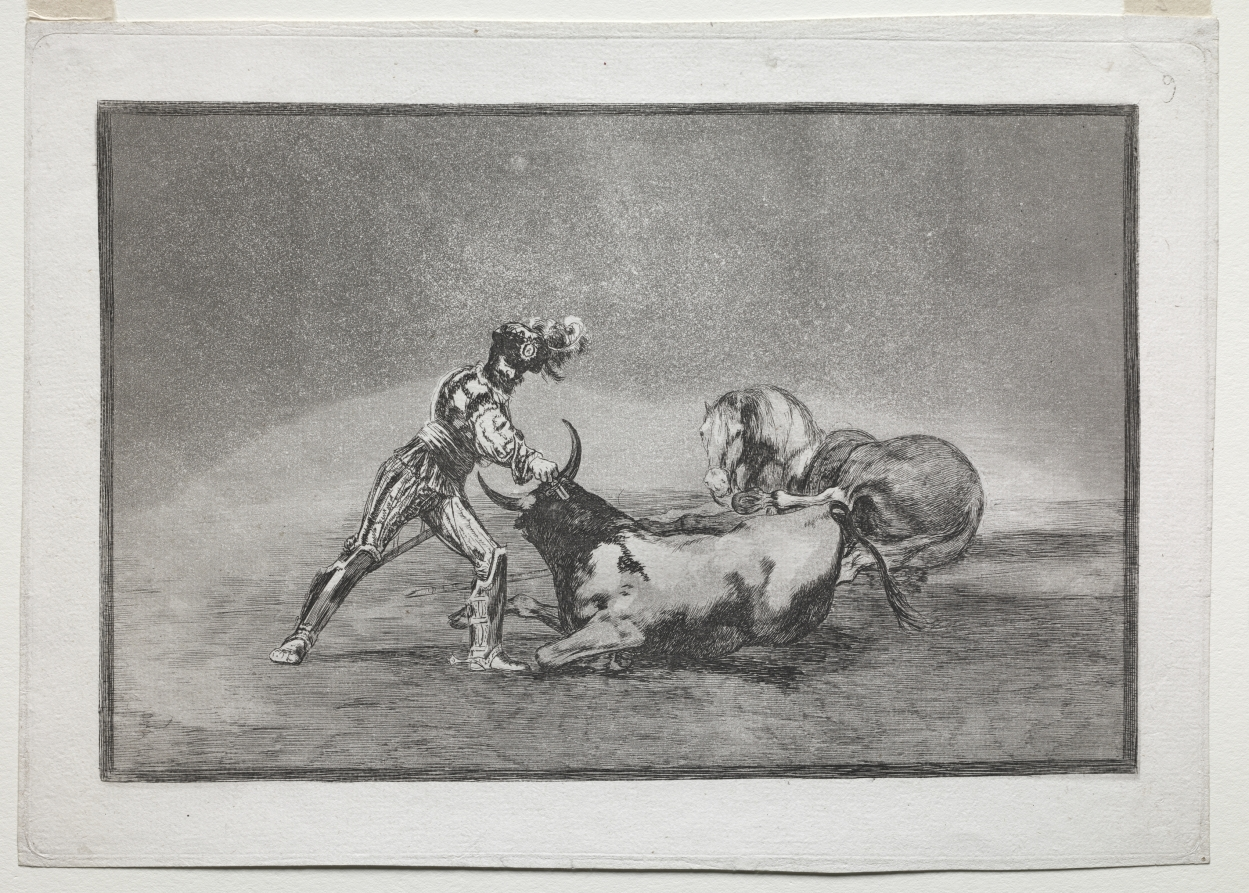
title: La Tauramaquia: A Spanish Knight Kills the Bull after Having Lost His Horse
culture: Spain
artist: Francisco de Goya (Spanish, 1746–1828)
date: 1815–1816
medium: etching, aquatint and engraving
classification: Print